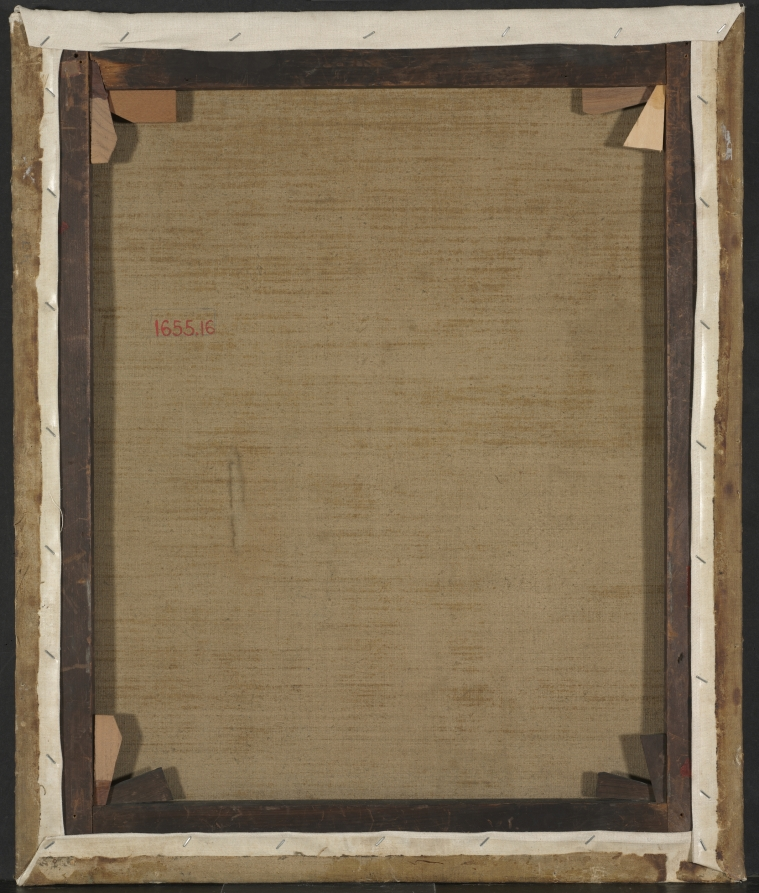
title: Portrait of Benjamin West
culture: England, 18th century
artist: copy after Thomas Lawrence (British, 1769–1830)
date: 1818 or later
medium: oil on canvas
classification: Painting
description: This bust-length portrait of the prominent American artist, Benjamin West, was allegedly painted by Thomas Lawrence. Although its attribution remains uncertain, the portrait's style and execution recalls other portraits of West by Lawrence, including the full-length painting now in the National Gallery, London. This smaller version may have been created when West was at an advanced age, and no longer able to stand for extended periods of time. However, as an exact, yet more freely painted likeness of the London portrait, this version also may be a copy made by Lawrence or one of his pupils after the full-length version.